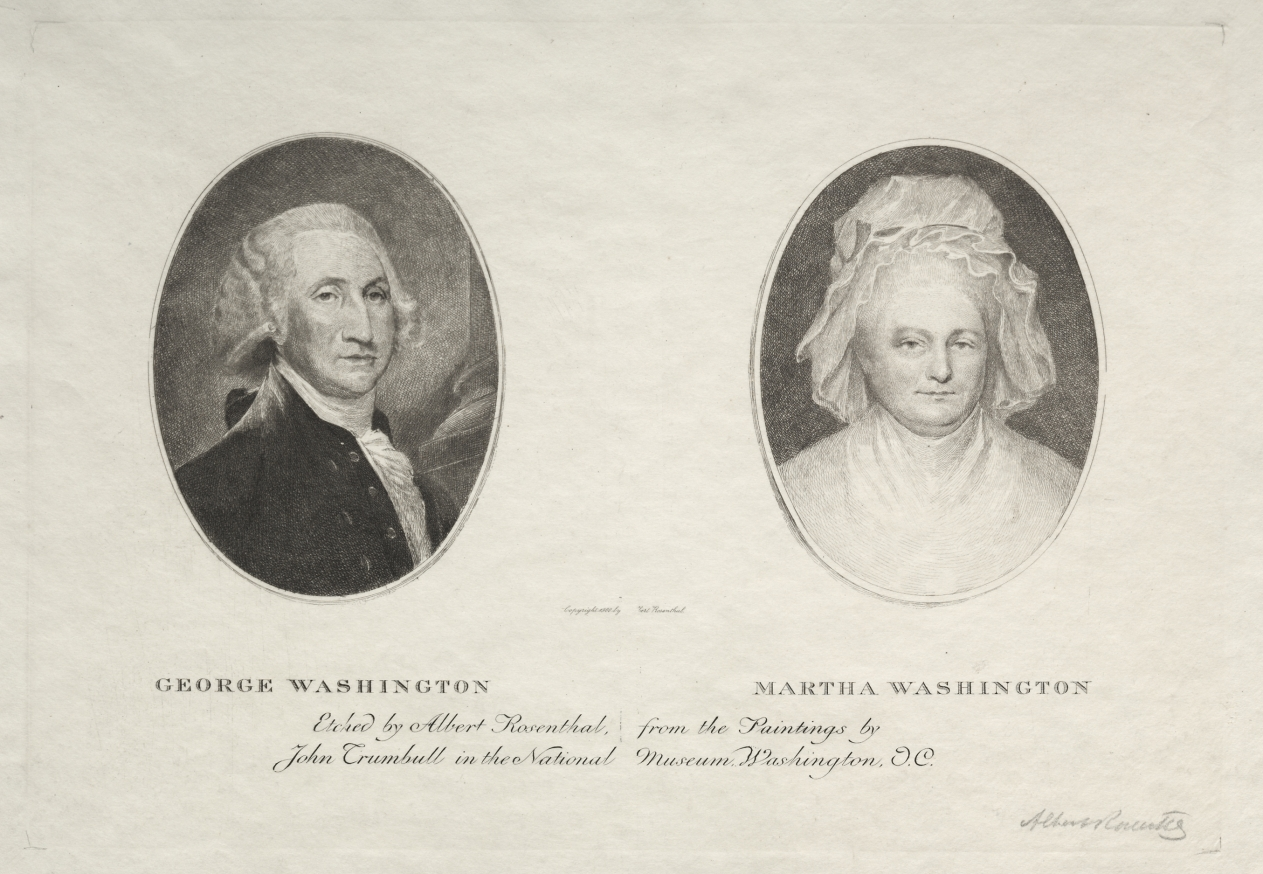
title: George and Martha Washington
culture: America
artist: Albert Rosenthal (American, 1863–1939)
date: 1863–1939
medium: etching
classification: Print